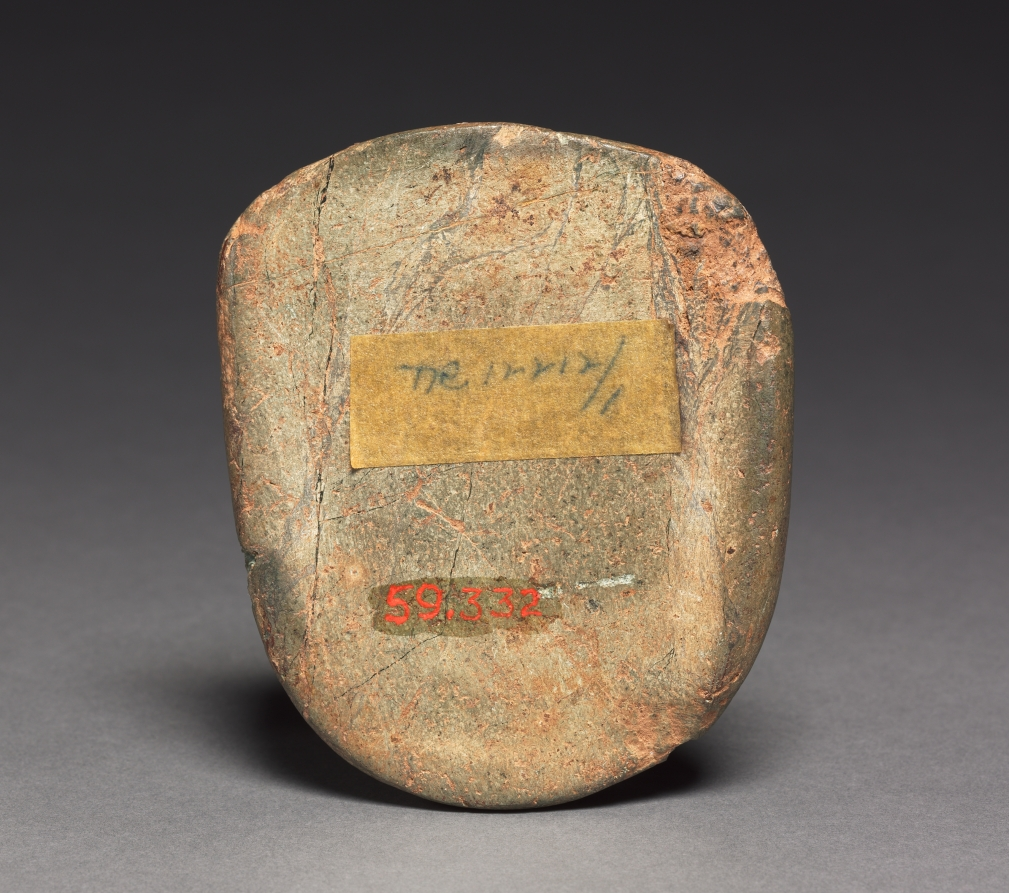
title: Mask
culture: Mesoamerica, Mexico, Guerrero, Mezcala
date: 1–800 CE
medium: stone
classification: Sculpture